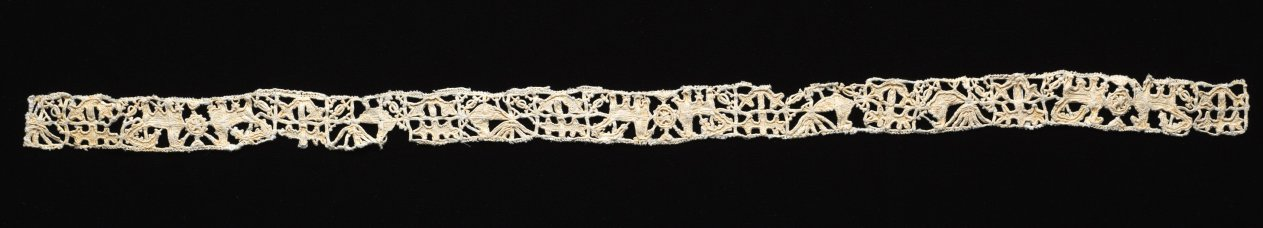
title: Lace Fragment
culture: Italy, 1600-1640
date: 1600–1640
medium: Linen: needle lace (reticella)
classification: Lace